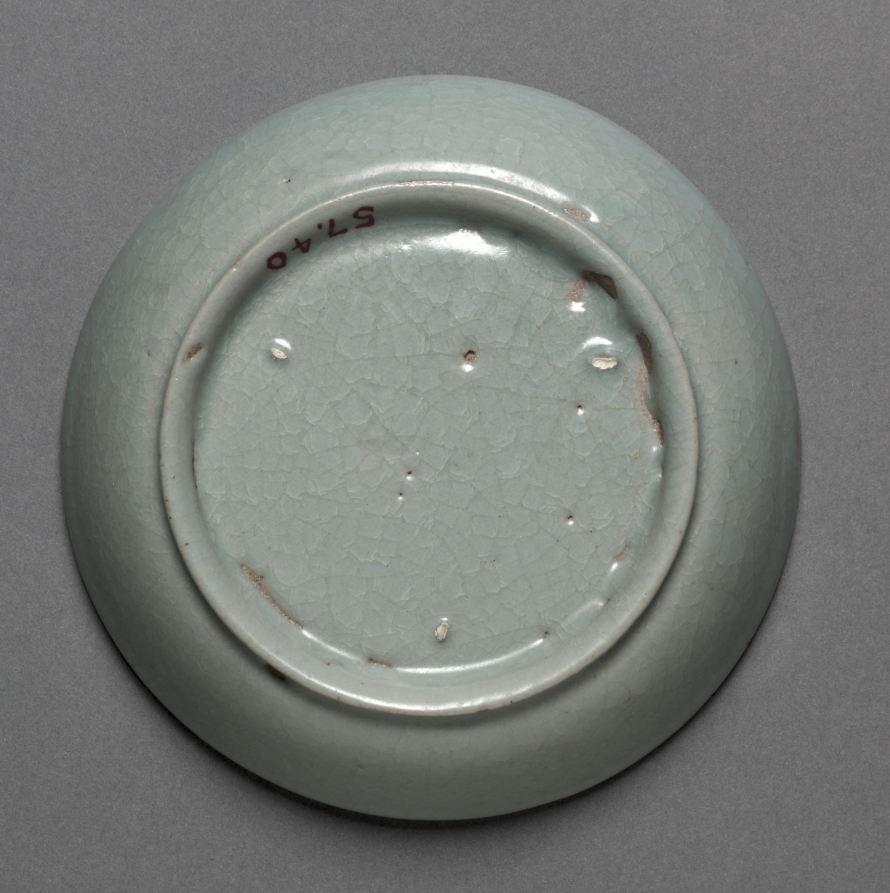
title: Brush Washer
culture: China, Henan Province, Baofeng, Qingliangsi, Northern Song dynasty (960-1127)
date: late 1000s–1127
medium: porcelaneous stoneware, Ru ware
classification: Ceramic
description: Ru ware is the rarest and most celebrated of all Chinese imperial wares. It was made for the late Northern Song court for a very short time and was therefore extremely rare and precious. Simplicity and refined elegance are Ru ware's hallmarks. Its graceful shape, soft luster, and subtle color variation of the glaze interact in perfect unity. Other physical characteristics include an ash-grey body, soft greyblue glaze with a fine crackle, as well as small sesame-seed spur marks on the base.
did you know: The little black spot in the glaze inside the dish is one of the slight imperfections characteristic of genuine Ru ware.